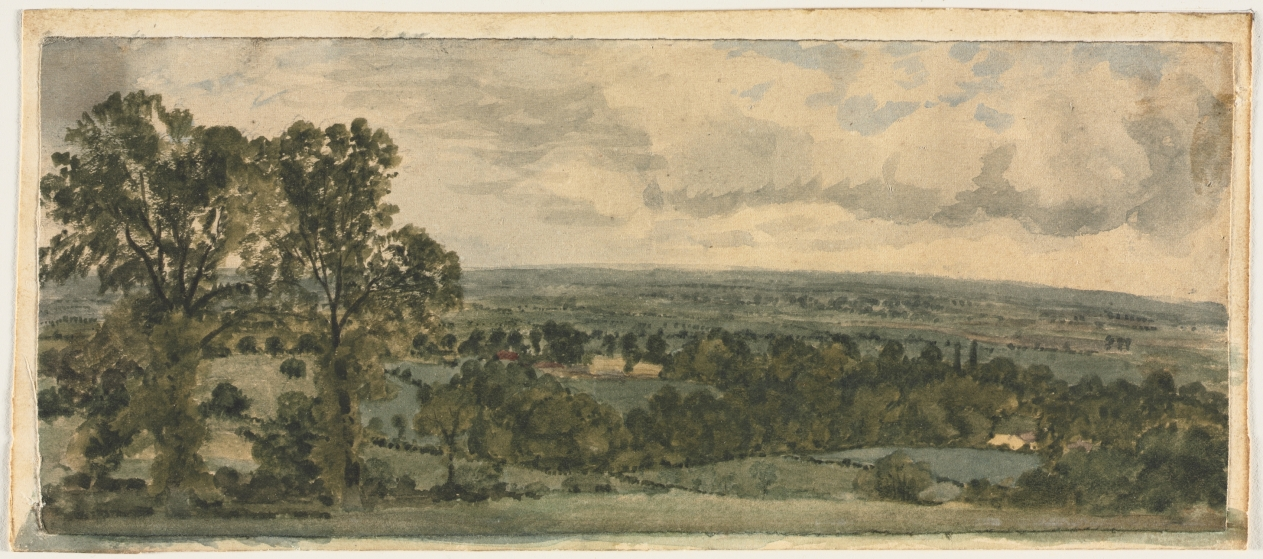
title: Landscape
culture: England, 19th century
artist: John Constable (British, 1776–1837)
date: c. 1796–1837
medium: watercolor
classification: Drawing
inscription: Inscribed on verso: "This drawing was presented to Miss Tham by Constable as a memento of his regards"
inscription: inscribed on verso: "E. Hope to E.F. White Esq."